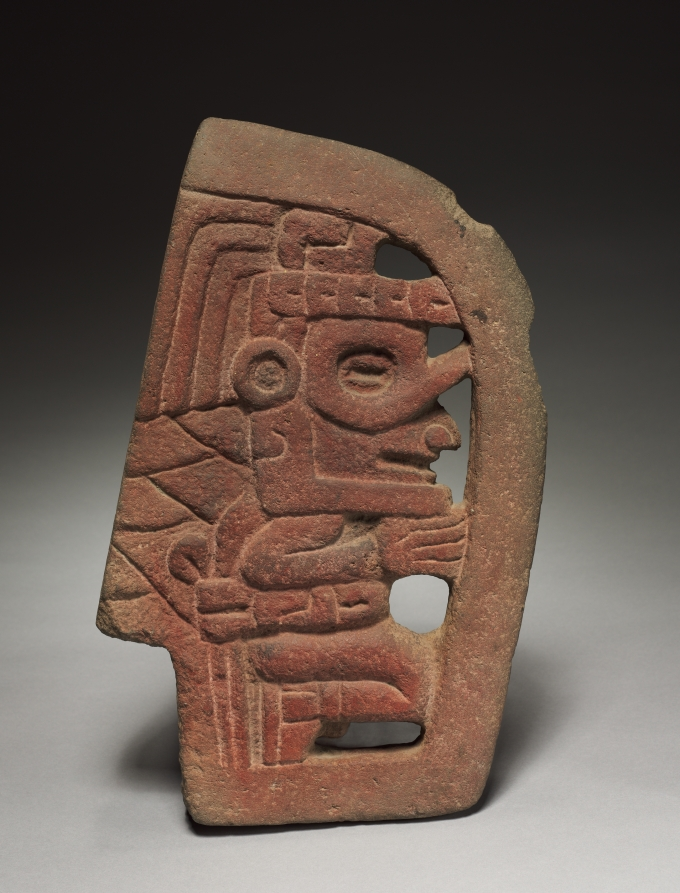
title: Hacha with Openwork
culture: Mexico, Veracruz, El Tajín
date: 600–1000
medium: gray volcanic stone with red pigment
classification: Sculpture